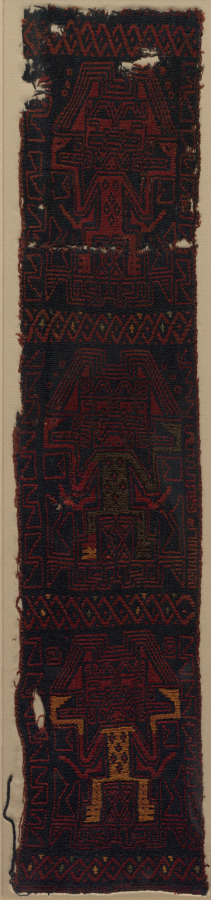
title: Textile Fragment with Three Frontal Deities and Interlace Pattern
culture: Peru, South Coast, Paracas (700 BC -AD 1), Yauca Valley?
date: 700–400 BCE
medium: camelid fiber; double-cloth with structural embroidery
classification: Textile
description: This textile fragment and (2005.14), belong to a group that represents Andean weavers’ earliest known achievements in double cloth, a technique that allows the creation of identical designs on both faces of the cloth but in reversed colors. They also record the devotion to abstraction typical of the Paracas style. One features three repeats of a highly geometrical standing deity with a fanged mouth. The other includes several stylized deity heads and a blocky, frontally posed feline. The type of garment that these fragments come from remains unknown.